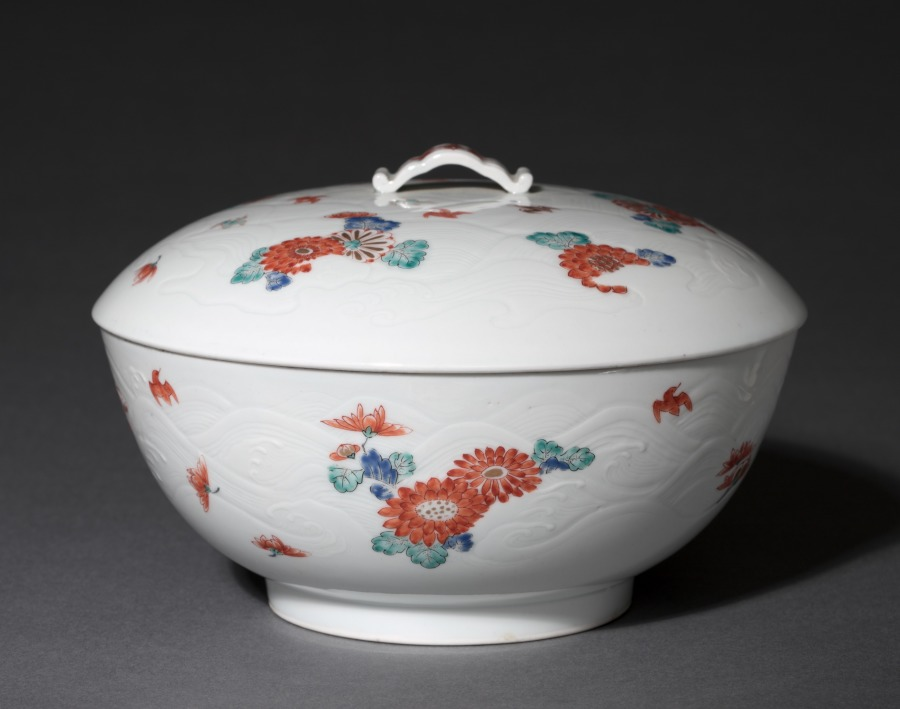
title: Covered Bowl with Chrysanthemums and Chidori: Kakiemon Ware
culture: Japan, Edo period (1615–1868)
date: early 1700s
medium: porcelain with decoration in colored enamels; molded design of waves on exterior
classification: Ceramic